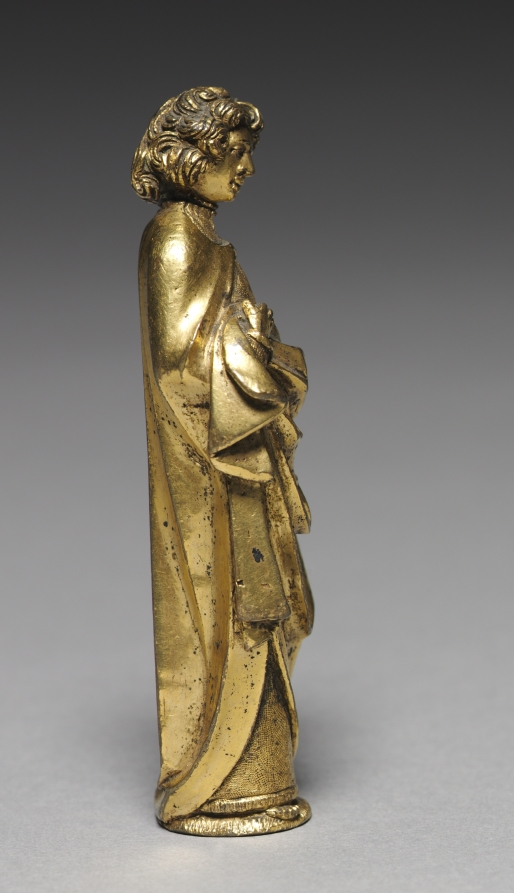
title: Mourning Saint John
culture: Germany, Franconia, late 15th century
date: late 1400s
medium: gilt bronze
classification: Sculpture